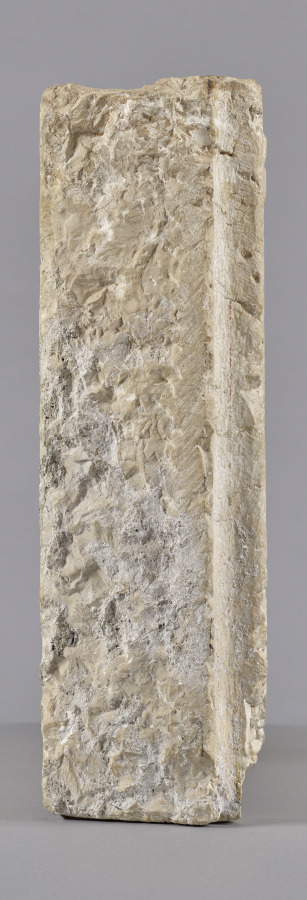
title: Tomb Relief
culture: Syria, Palmyra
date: 230 CE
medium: limestone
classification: Sculpture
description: Although its findspot is unknown, this high relief almost certainly once sealed a burial niche of a mausoleum at Palmyra. It illustrates a blending of Roman and Parthian artistic traditions. Set within a sumptuous border of beads and leaves, a wealthy man awakens on a luxuriously cushioned bed as his attendant offers him a wine bowl decorated with crosshatchings. Both are dressed according to Parthian custom, wearing pants and pleated tunics, but the man’s languid pose is taken from classical prototypes. The subject is a variant of a formulaic funerary banquet scene in which proffered wine welcomes the deceased into a well-appointed afterlife.